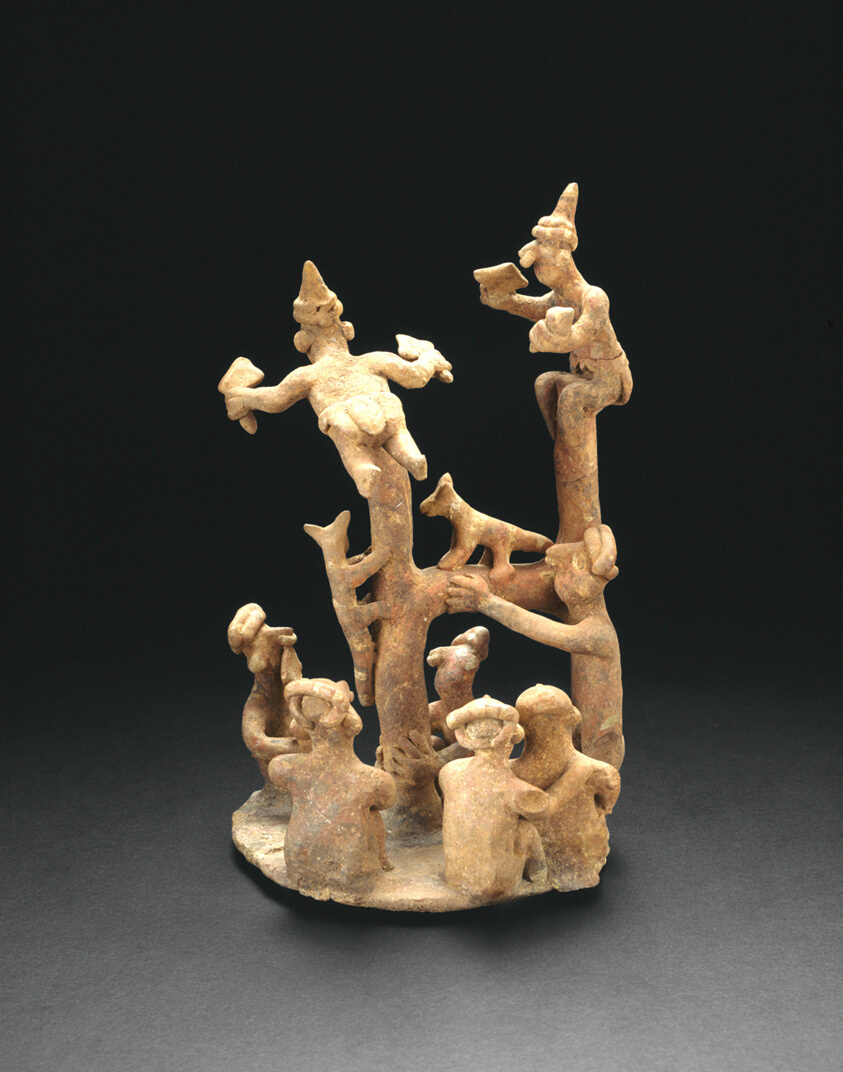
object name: Model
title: Model of a Tree-Climbing Ritual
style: nayarit, mesoamerican, Pre-Columbian, americas, west mexico, ixtalan del rio, Arts of the Americas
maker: Nayarit (Ixtlán del Río, Nayarit, Mexico)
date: 100–800 CE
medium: Ceramic and pigment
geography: Nayarit state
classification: ceramics; earthenware; art of the americas; sculpture; model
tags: people, celebrations, ritual, acrobats, performance